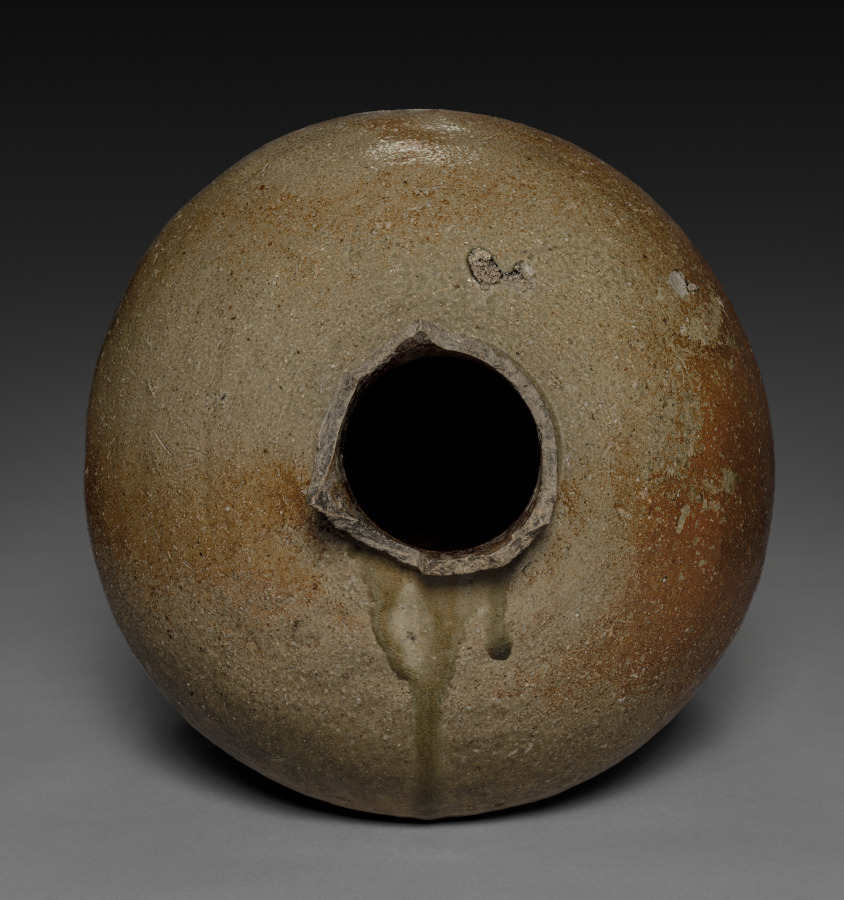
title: Storage Jar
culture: Japan, Muromachi period (1392–1573)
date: 1400s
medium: Stoneware with natural ash glaze (Tamba ware)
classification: Ceramic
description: For centuries the Tokai region surrounding present-day Nagoya has been an especially fertile ceramic production center. One site was a group of kilns located west of Kyoto, in Tamba province. Nestled in a farming valley in the mountains behind the modern port of Kobe, Tamba required a regular supply of storage vessels and sturdy containers for distributing grain. This jar was formed in three sections, each fluted to the next and turned on a potter's wheel to scrape off excess material. Both interior and exterior walls were smoothed with a wooden or bamboo tool, leaving markings on the lower body and shoulder. The neck opening is small and wheel-turned, as is the neck, which bears fine lines and a matte-glazed surface. The lustrous green glaze that highlights the jar once trailed from the vessel's lip and clung to the entire shoulder wall, mingling with the warm, orange-brown tone of the clay body underneath. The surface is crackled with craters where stone material within the clay migrated up to the surface during firing and then fell away. The result is a particularly rich and varied "landscape," typical of Tamba ware's subdued, earthy vitality.